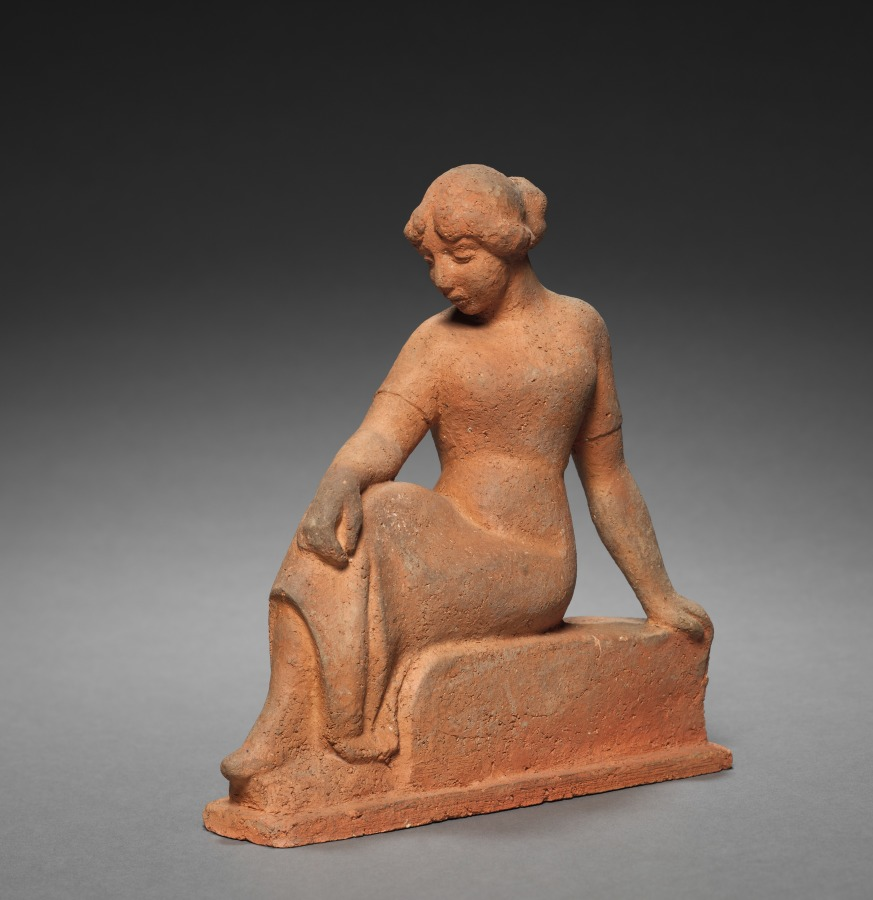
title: Seated Woman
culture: France, 20th century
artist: Aristide Maillol (French, 1861–1944)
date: c. 1900 – 1944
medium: terracotta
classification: Sculpture